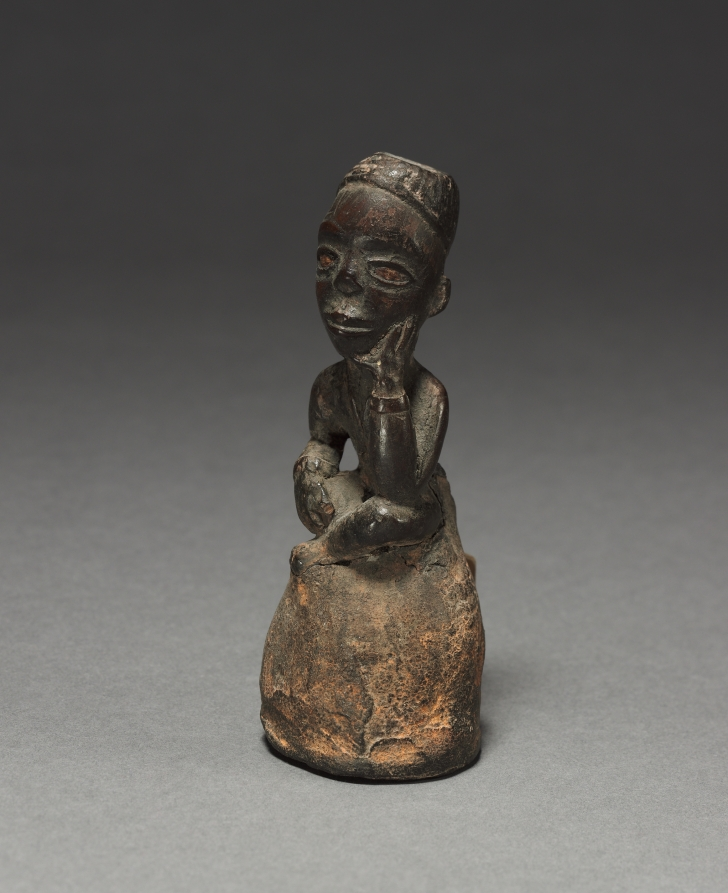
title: Power figure (nkisi)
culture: Africa, Central Africa, Republic of the Congo, Kongo-style maker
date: late 1800s-early 1900s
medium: Wood, organic materials (including resin), cloth, glass, and various other materials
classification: Sculpture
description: One of seven anthropomorphic figurines, these minkisi contained medicines in which an ancestral spirit was believed to reside. The medicines served a metaphorical rather than literal purpose in the resolution of conflicts among Kongo people. This asymmetrical figure wears a mpu headdress of chiefs with its characteristic geometric decoration. The pose may refer to a state of mourning.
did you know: Different from other Minkisi who hold their power in their abdomen, this figure sits atop a sphere in which the active substances still reside.